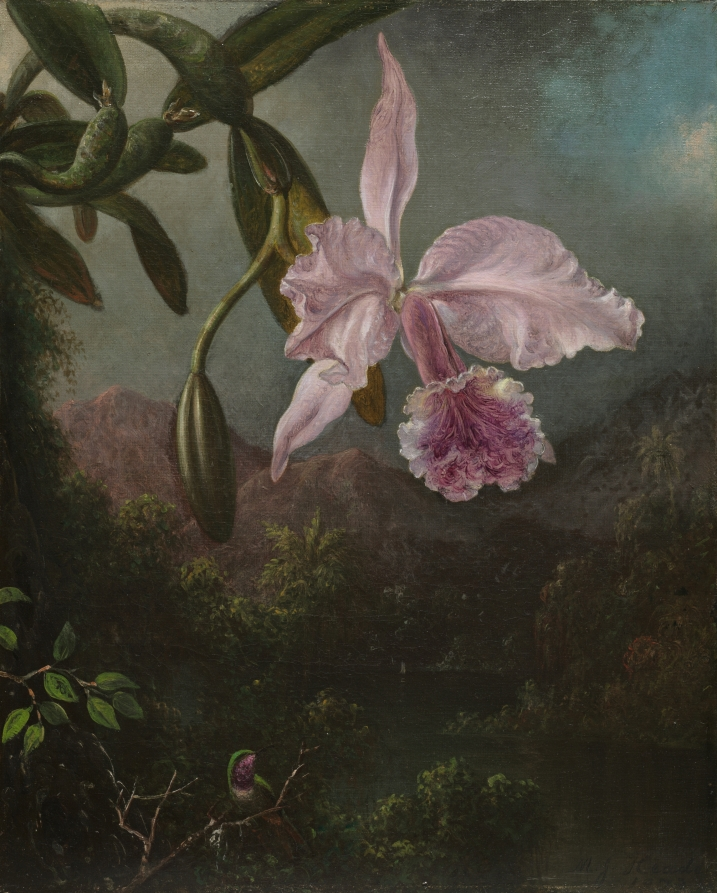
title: Orchid Blossoms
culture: America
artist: Martin Johnson Heade (American, 1819–1904)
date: 1873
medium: oil on canvas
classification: Painting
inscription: signed lower right: M.J. Heade / 1873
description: At the time he created this work, Martin Johnson Heade had made three trips to Central and South America. As an outgrowth of these experiences, he made a large number of paintings of birds and flowers, especially orchids, in a tropical setting.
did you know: Ten years after painting Orchid Blossoms, artist Martin Johnson Heade married at the age of 64.